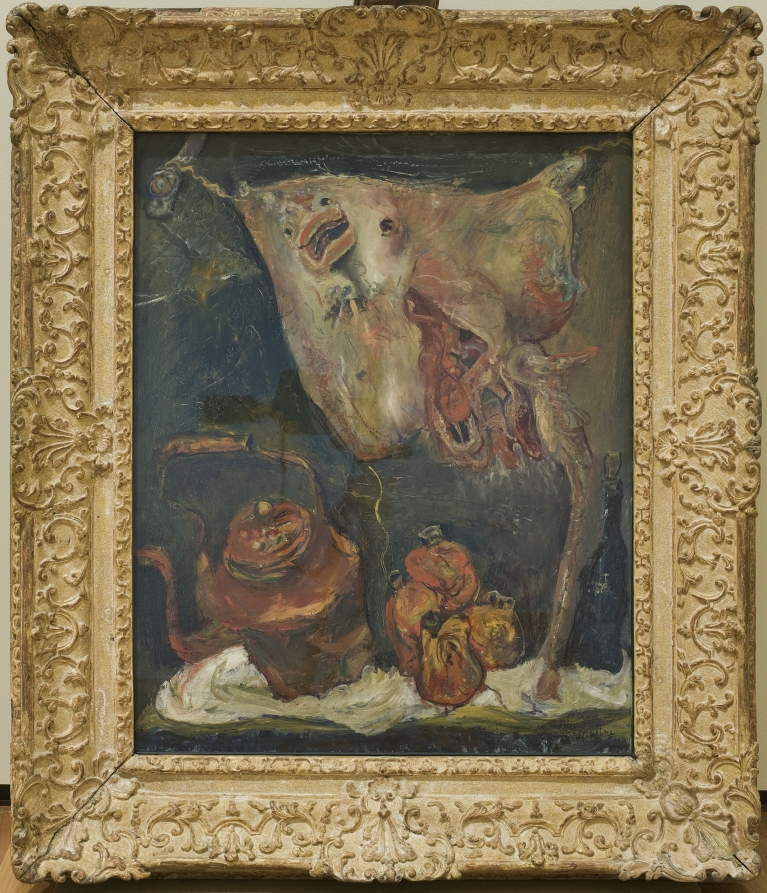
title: Still Life with Rayfish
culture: Russia (worked in France), 20th century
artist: Chaïm Soutine (Russian, 1893–1943)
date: 1923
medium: oil on canvas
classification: Painting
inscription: Signed lower right: "Soutine"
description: The mutilated ray fish in this painting is strung across the top of the canvas, as if tortured or crucified, as its internal organs spill forth. The fish seems to express human anguish, transforming it into a powerful metaphor for suffering. Below the fish is a kettle that seems to twist away from the fish. Chaïm Soutine frequently depicted animal carcasses in his paintings, highlighting their vulnerability and the violence of their deaths. Such paintings may allude to his own despair, from his youth as the 10th of 11 children of parents in poverty in a small Orthodox Jewish community in what is now Belarus, to his early years in Paris as a struggling artist.